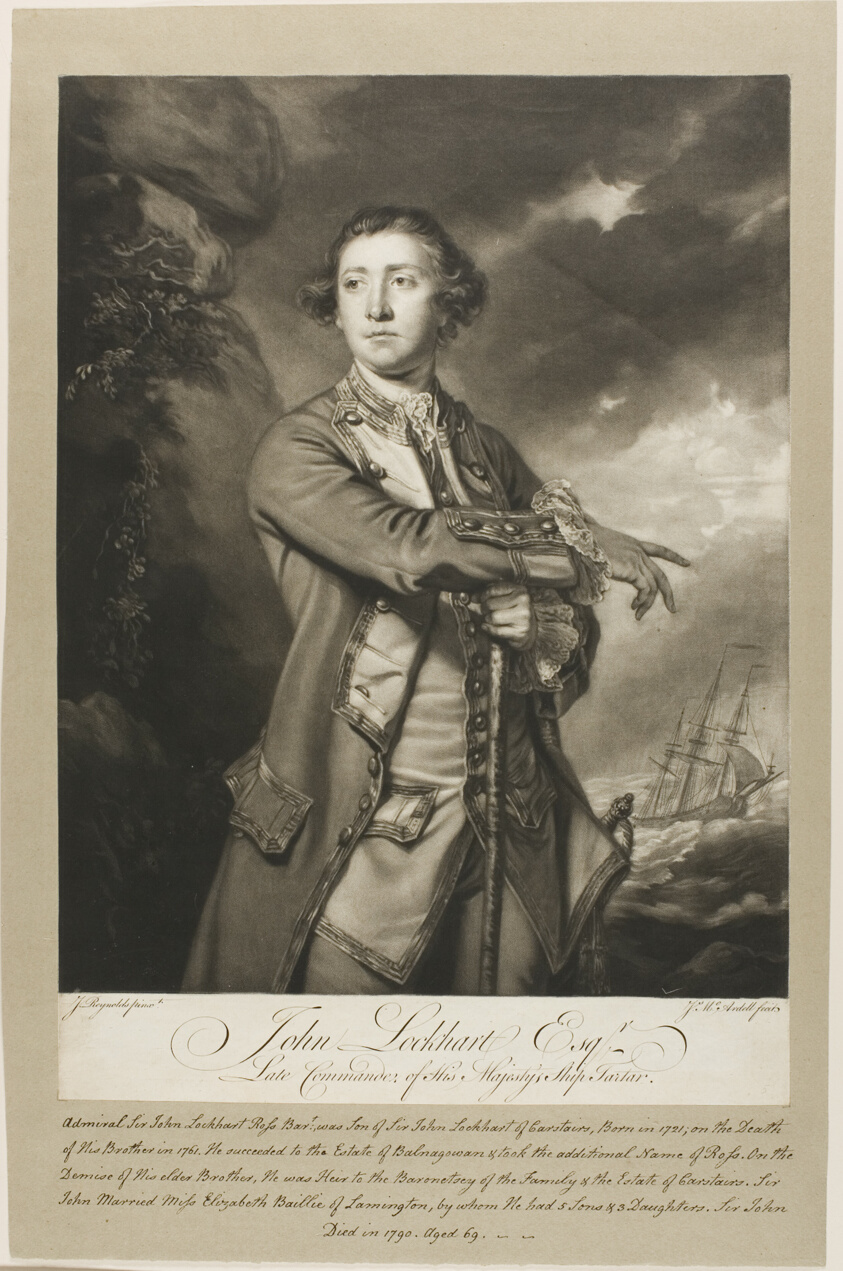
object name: Print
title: Portrait of John Lockhart, Esquire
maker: James McArdell (Irish, c. 1728-1765); after Sir Joshua Reynolds (English, 1723-1792)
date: c. 1770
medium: Mezzotint on paper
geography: Ireland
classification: mezzotint; print; prints and drawing